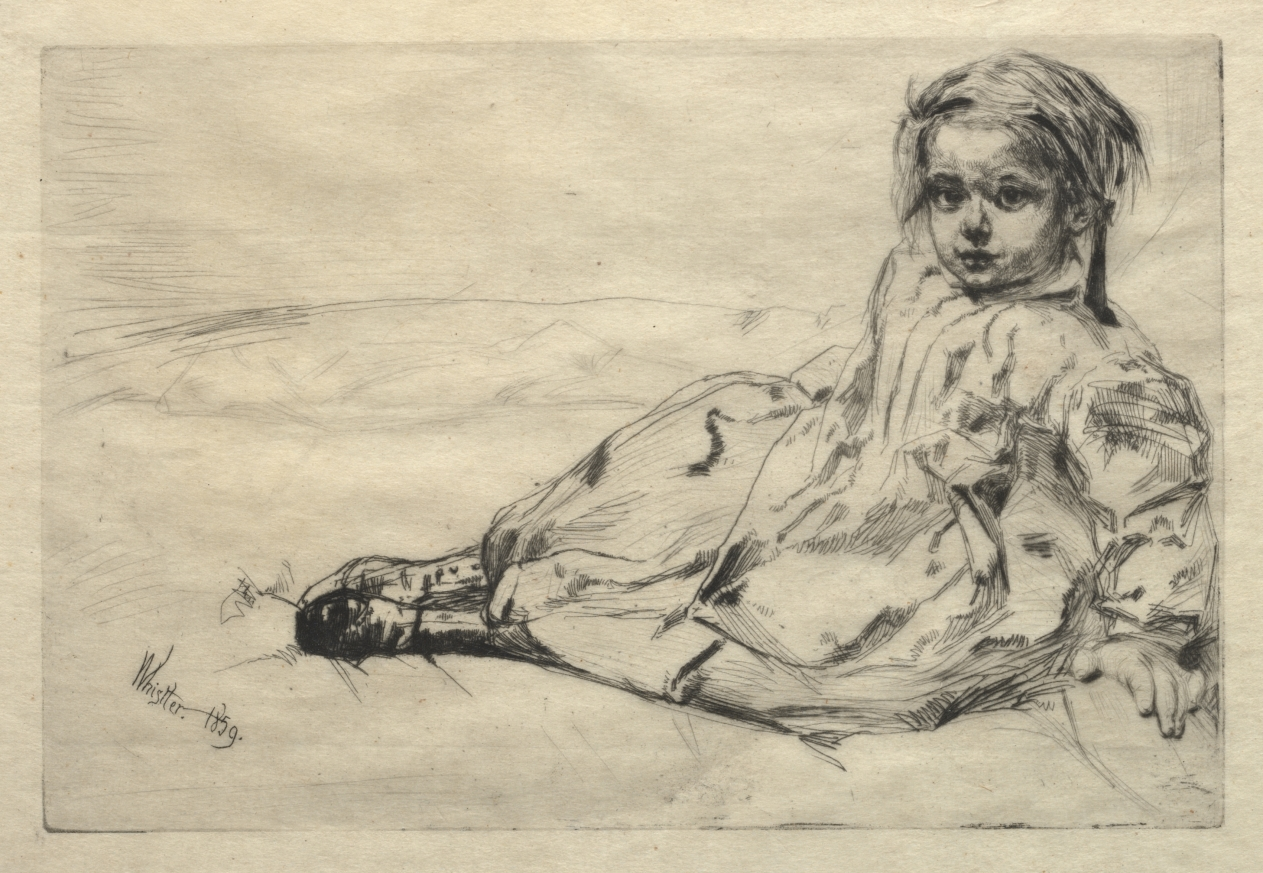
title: Bibi Valentin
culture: America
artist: James McNeill Whistler (American, 1834–1903)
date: 1859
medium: etching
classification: Print